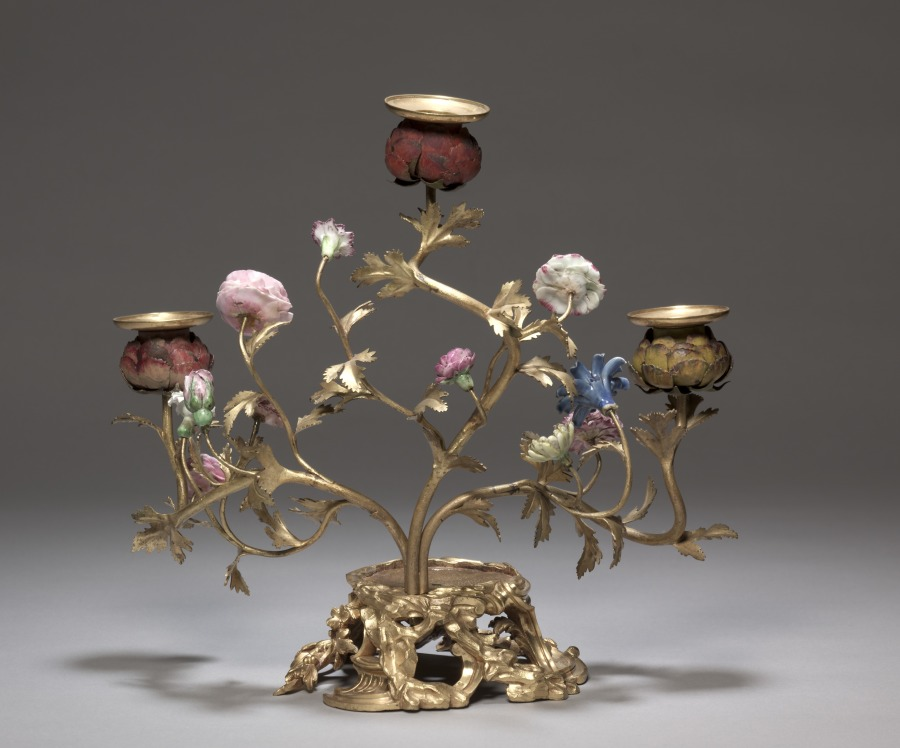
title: Candelabrum with Parrot (Candelabrum)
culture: France, style of Louis XV, 18th century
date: c. 1750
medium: gilt bronze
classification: Furniture and woodwork